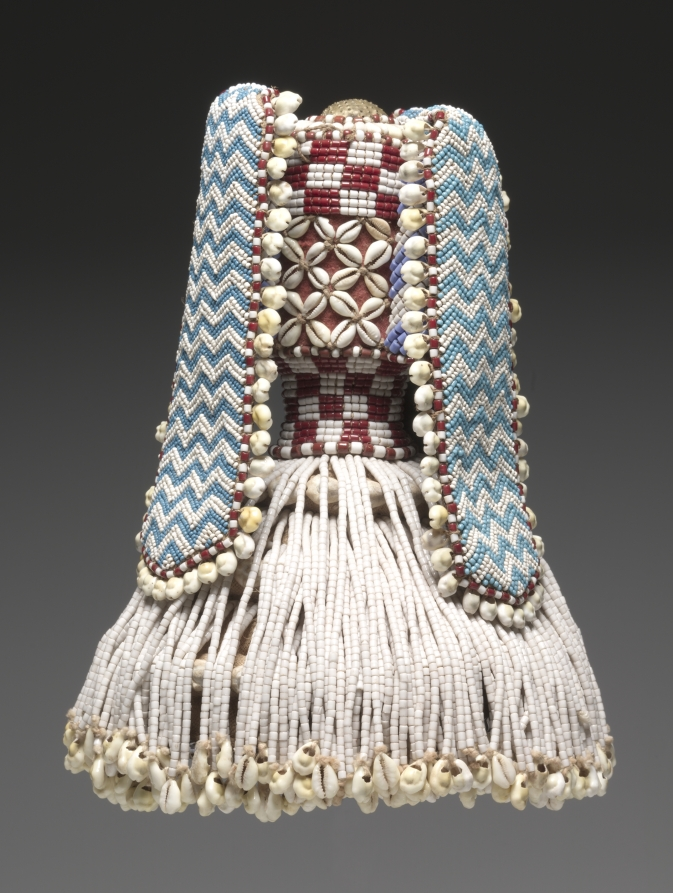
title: Hat (Kalyeem)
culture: Africa, Central Africa, Democratic Republic of the Congo, Kuba-style maker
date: possibly early 1900s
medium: Raffia, glass beads, cowrie shells, cloth (including wool), thread, and copper alloy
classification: Garment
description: Kuba men (and some women) show their title and status with hats and hat accessories. The male owner of this heavily beaded and shell-covered hat (kalyeem) had a senior title. A simple coiled basketry hat forms its foundation (similar to 1915.465). Fabric panels stitched with zig-zagging white and blue beads edged in cowries hang from the top. White bead strands with cowrie shells flow downward, pushed out over the forehead by a large brim. Technically and aesthetically, beaded Kuba hats and masks have much in common; artists specializing in beading techniques had the skills to make both, using imported beads and shells.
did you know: The imported beads and shells on this hat were expensive, so they showed off its wearers' wealth.